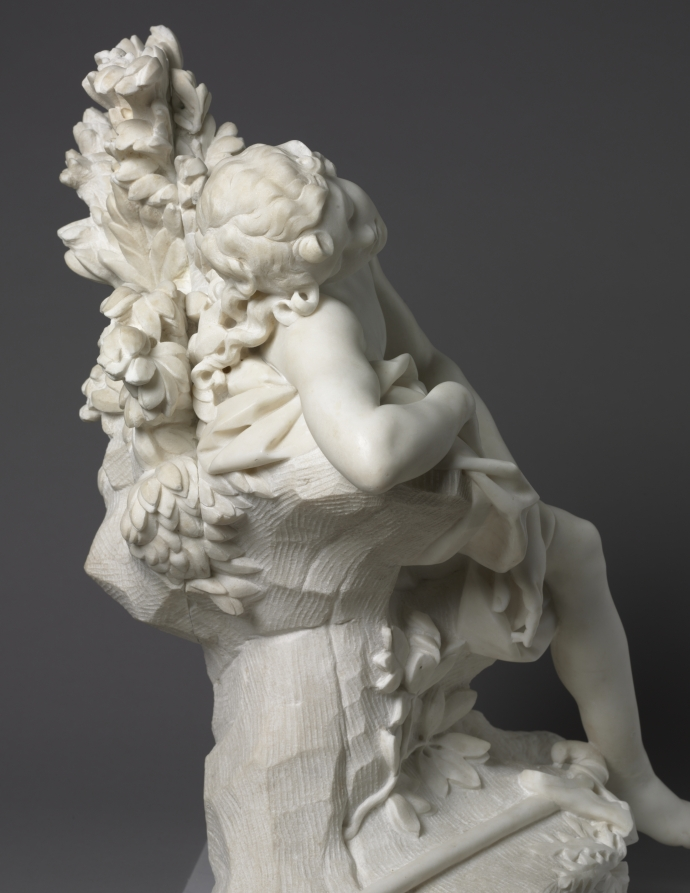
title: Sleeping Endymion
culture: Italy, 18th century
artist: Agostino Cornacchini (Italian, 1686–1754)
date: 1716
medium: marble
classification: Sculpture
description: Cornacchini moved away from the dramatic movement and light effects characteristic of baroque sculpture toward a calmer, gentler, more graceful style favored by 18th-century taste. This sculpture depicts Endymion, a beautiful young shepherd from Greek mythology. His beauty so entranced Selene, the personification of the moon, that she asked Zeus to grant Endymion immortality. Zeus did so, but only after placing Endymion in an eternal sleep.